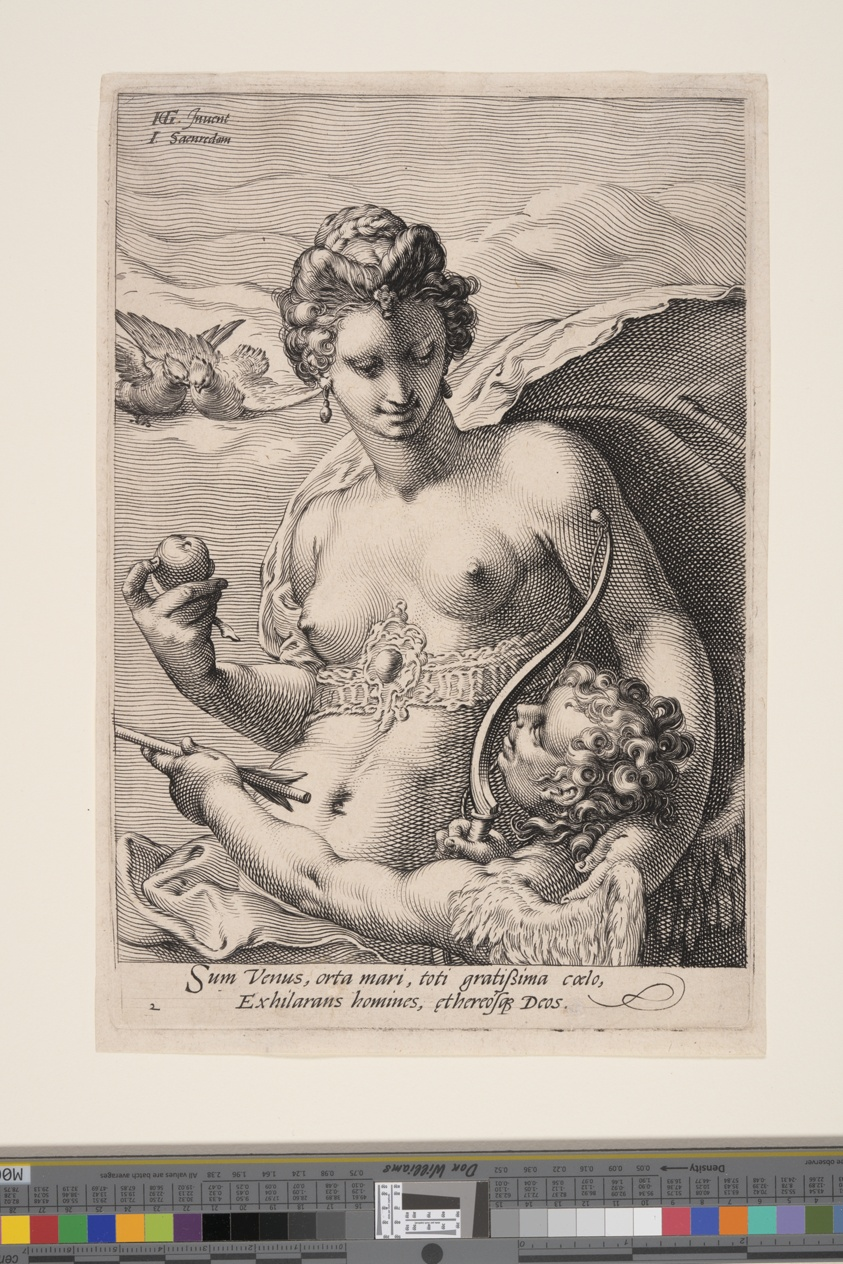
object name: Print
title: Venus and Cupid, from Three Goddesses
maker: Jan Saenredam (Dutch, 1565–1607); after Hendrick Goltzius (Dutch, 1558–1617)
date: c. 1595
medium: Engraving on laid paper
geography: Netherlands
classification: print; engraving; paper; prints and drawing